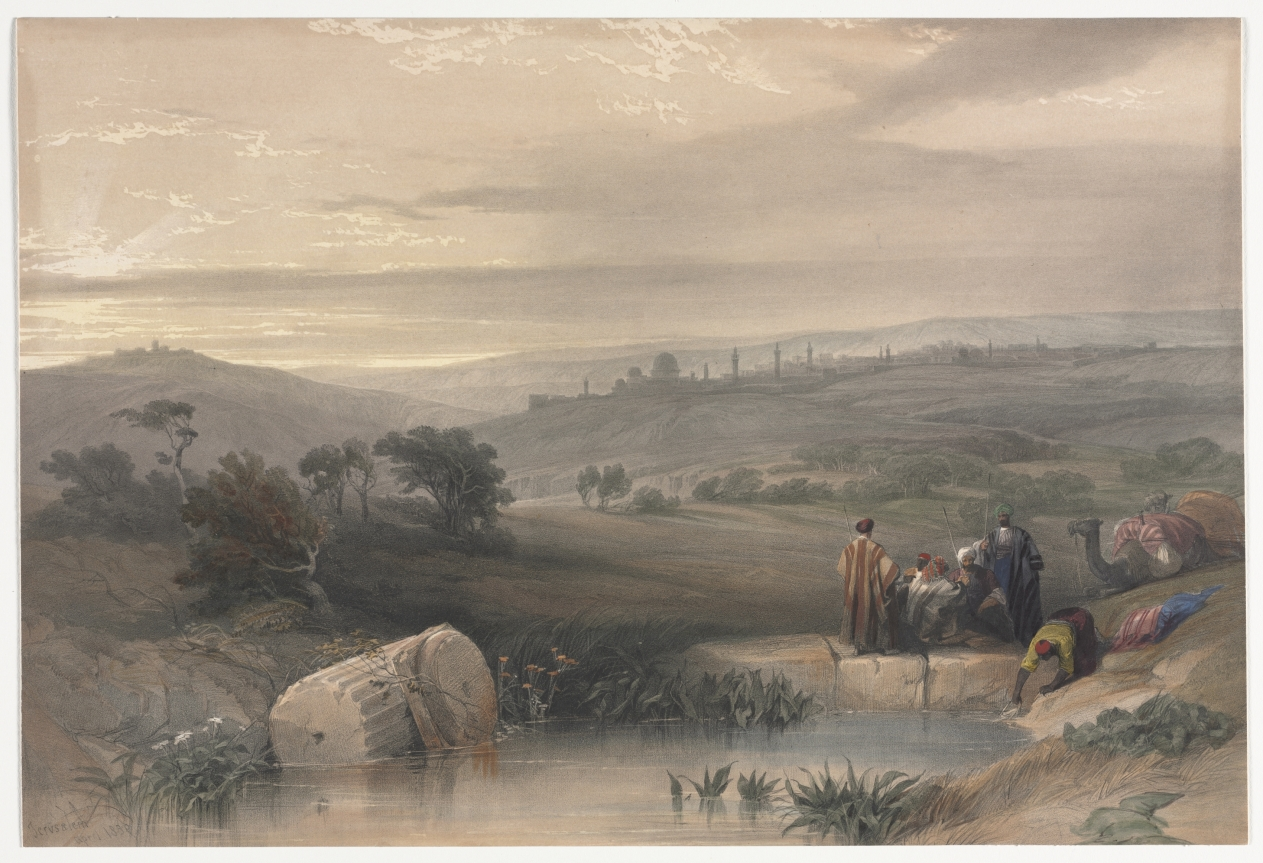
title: Jerusalem from the North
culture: England, 19th century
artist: David Roberts (Scottish, 1796–1864)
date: 1839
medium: color lithograph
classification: Print